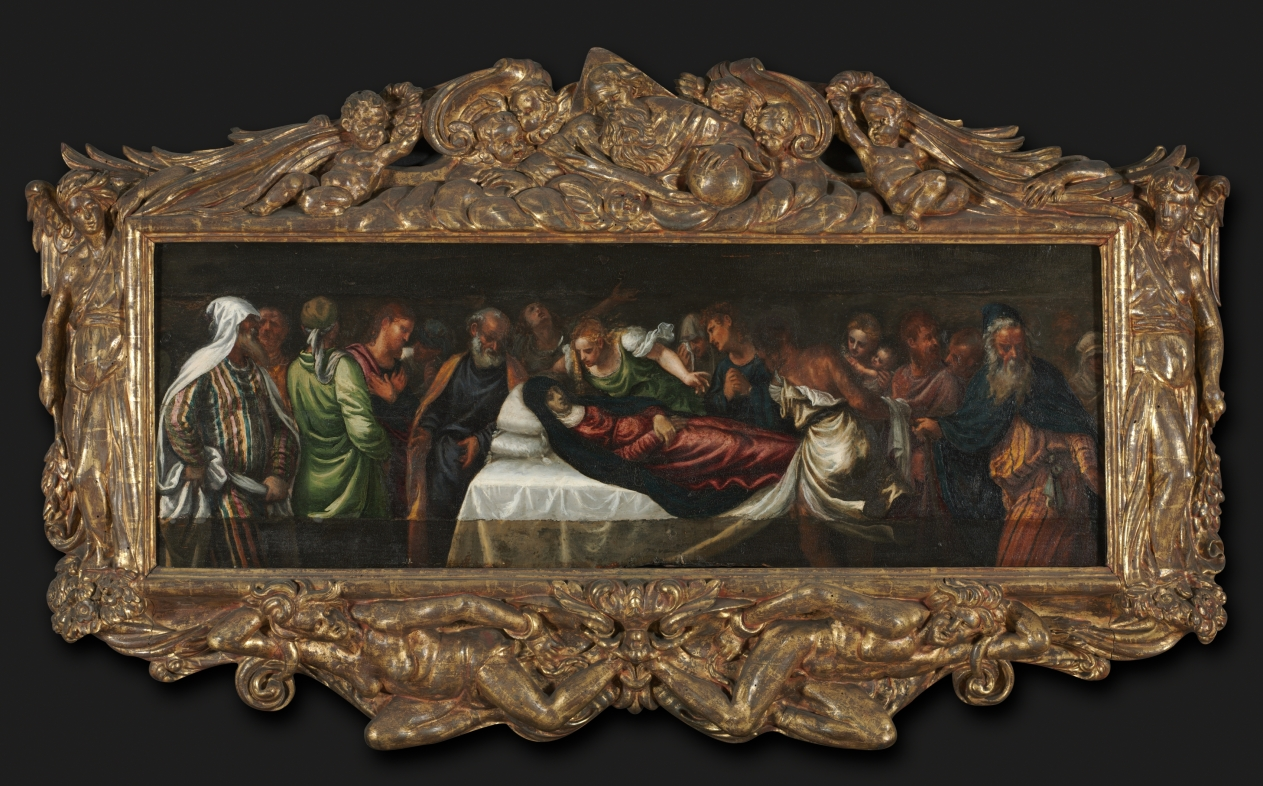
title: Death of the Virgin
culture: Italy, Venice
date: mid-1500s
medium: oil on wood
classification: Painting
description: This panel reveals a long history of changes. The initial work was painted on a single slab of wood, with strips left unpainted along the top and bottom. At an unknown time, the panel was probably cut down on the right and left sides, and the two blank strips at the top and bottom were filled in to enlarge the picture, most likely to fit its current, elaborately carved, 18th-century frame. Although these additions must have been initially more convincing, they were painted to match the yellowed and darkened original image, and thus no longer match the original paint. The flat and mismatched handling of the draperies in the lower portion also signal the intervention of a subsequent hand. The painting may have been part of an altarpiece as the predella, a long, horizontal painting along the base. The bottom of this panel exhibits signs of damage from fire and smoke, perhaps from the candles that could have been placed in front of it.